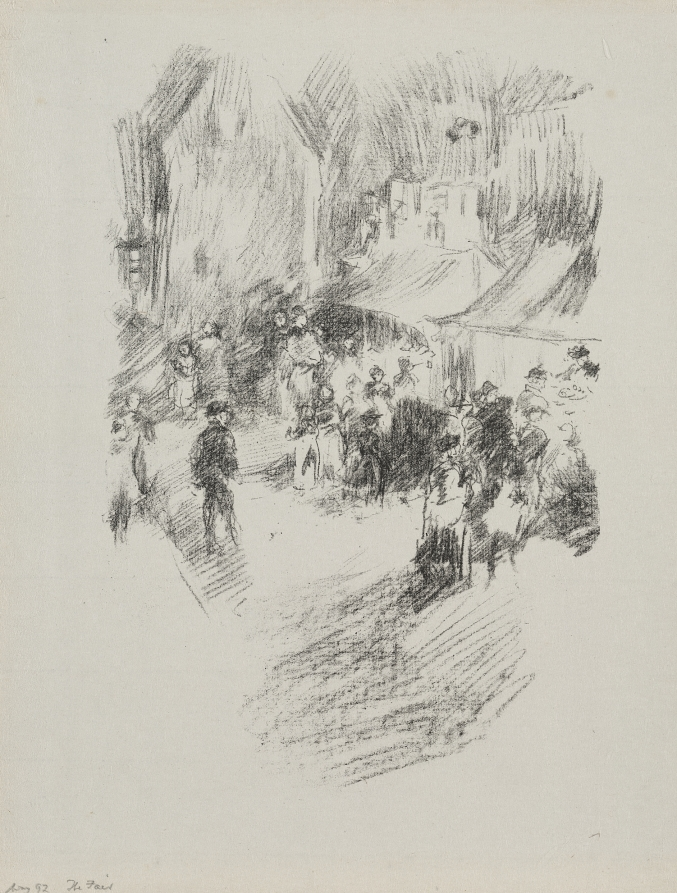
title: The Fair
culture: America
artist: James McNeill Whistler (American, 1834–1903)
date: 1895–1896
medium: lithograph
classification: Print